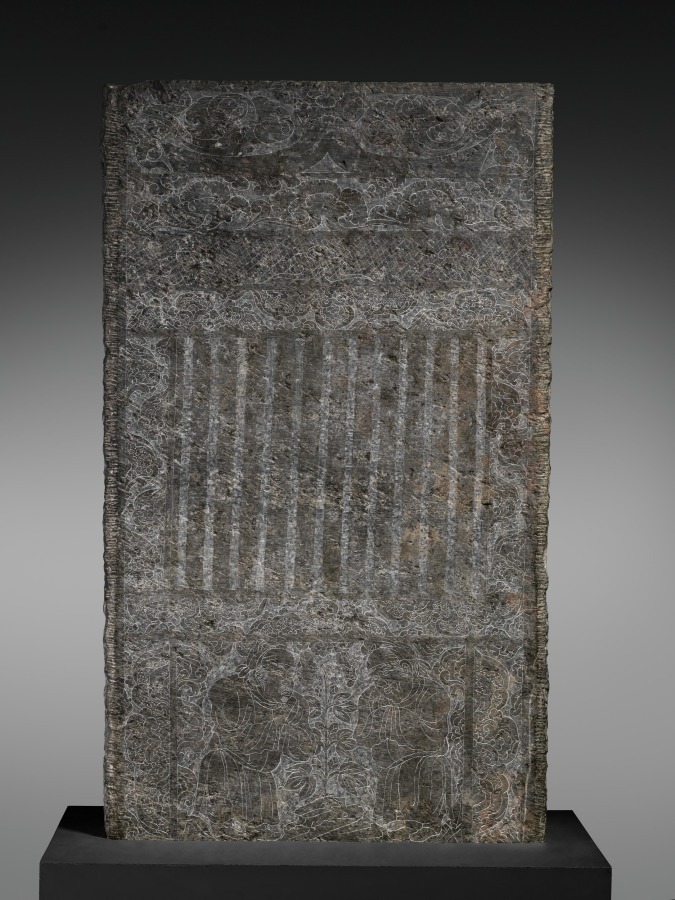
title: Sarcophagus Panel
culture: China, Tang dynasty (618-907)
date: early 700s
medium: limestone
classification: Sculpture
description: This slab originally formed the "window" panel of a coffin encasement constructed to resemble a one-story house. The dwarfs bowing respectfully under the vertical lattice window, as well as the court lady and archer engraved on the reverse, reflect the style of contemporary figure painting. Complete structures with similar décor have been excavated from tombs in the Tang imperial cemetery near Xian in northwest China.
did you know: The two sides of the stone were engraved during the Tang dynasty, but the court lady and archer were likely carved 50 years later.